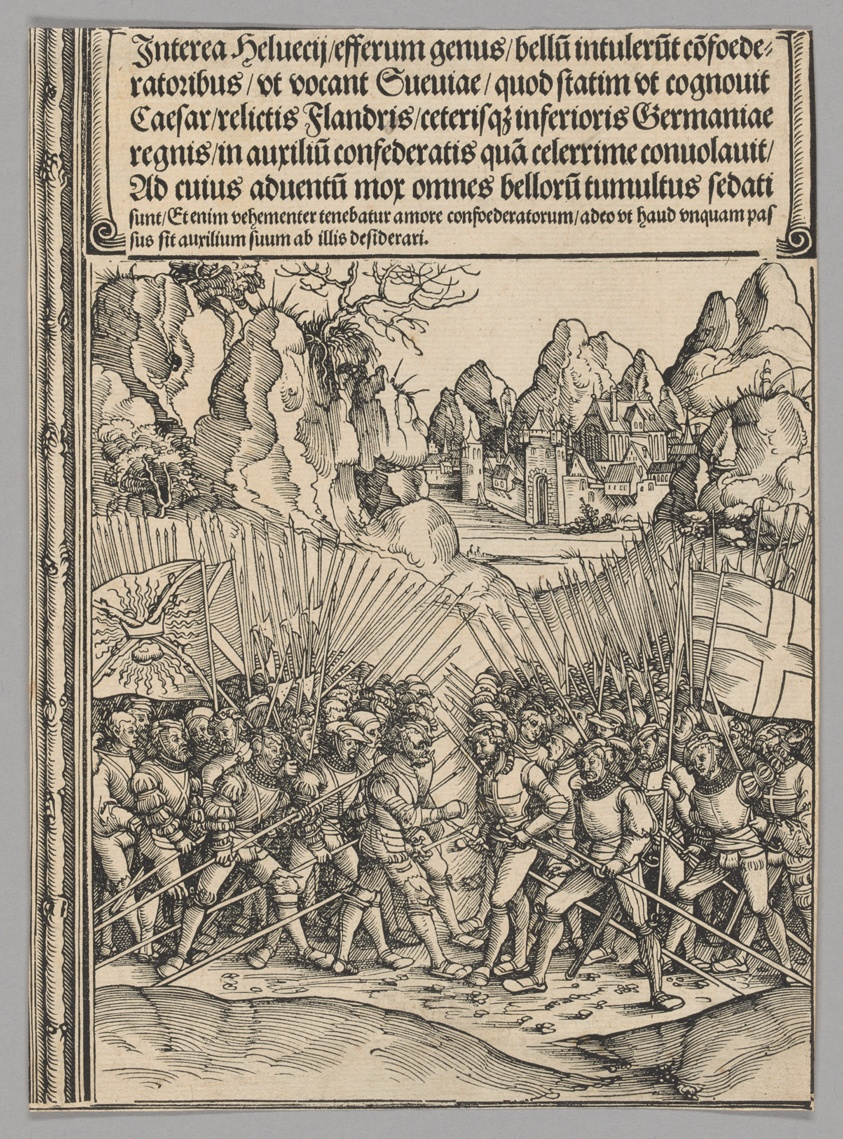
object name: Print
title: Swiss War, plate 16 from Historical Scenes from the Life of Emperor Maximilian I from the Triumphal Arch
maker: Wolf Traut (German, c. 1480-1520); printed by Hieronymus Andreae (German, died 1556)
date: 1515-17, printed c. 1520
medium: Woodcut in black ink on cream laid paper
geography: Germany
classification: print; paper; woodcut; prints and drawing